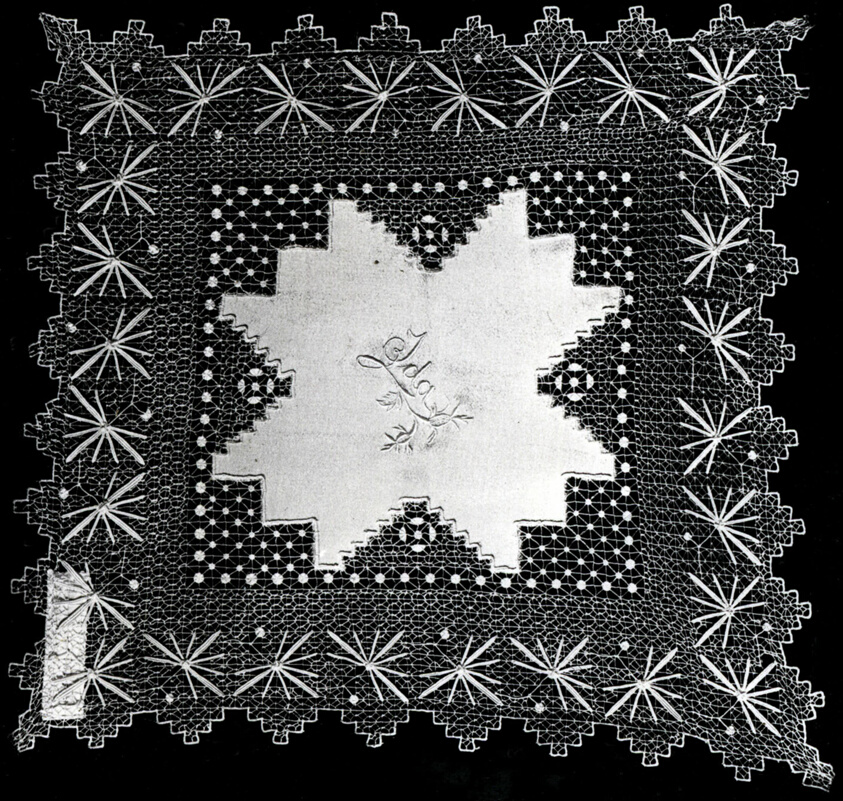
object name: Textile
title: Handkerchief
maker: Hermione Rosales (Colombian, active c. late 19th century); Colombia, Bogotá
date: 1850/1900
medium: Silk, plain weave; embroidered in back, buttonhole, overcast. padded overcast, and padded satin stitches; edged with square knotted netting; embroidered in open buttonhole filling, buttonhole; darned leave, and interlocking lace stitches; woven wheels and half wheels (lacis)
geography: Colombia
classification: textile; needlework (visual works); weaving; accessories (object genre)